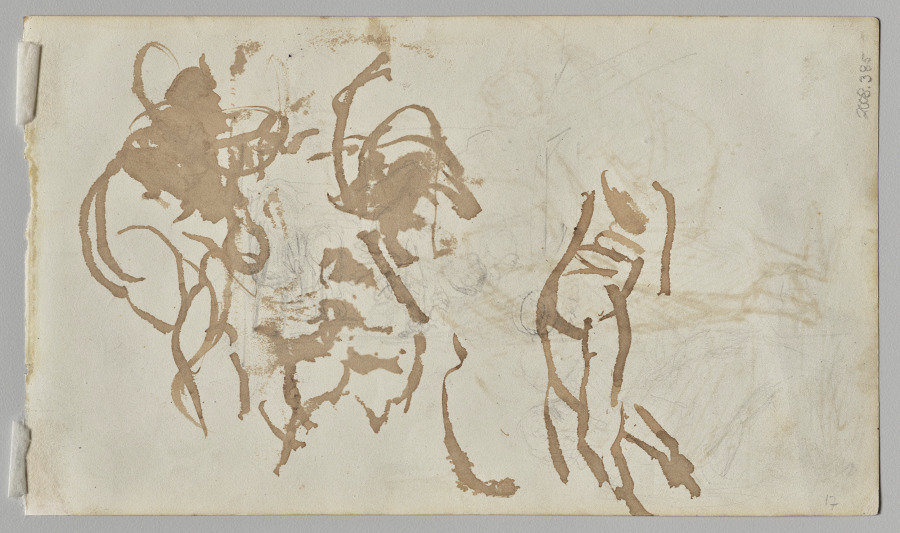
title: Sheet of Studies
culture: France, 19th century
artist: Paul Cezanne (French, 1839–1906)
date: 1871–76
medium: graphite and pen and brown ink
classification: Drawing